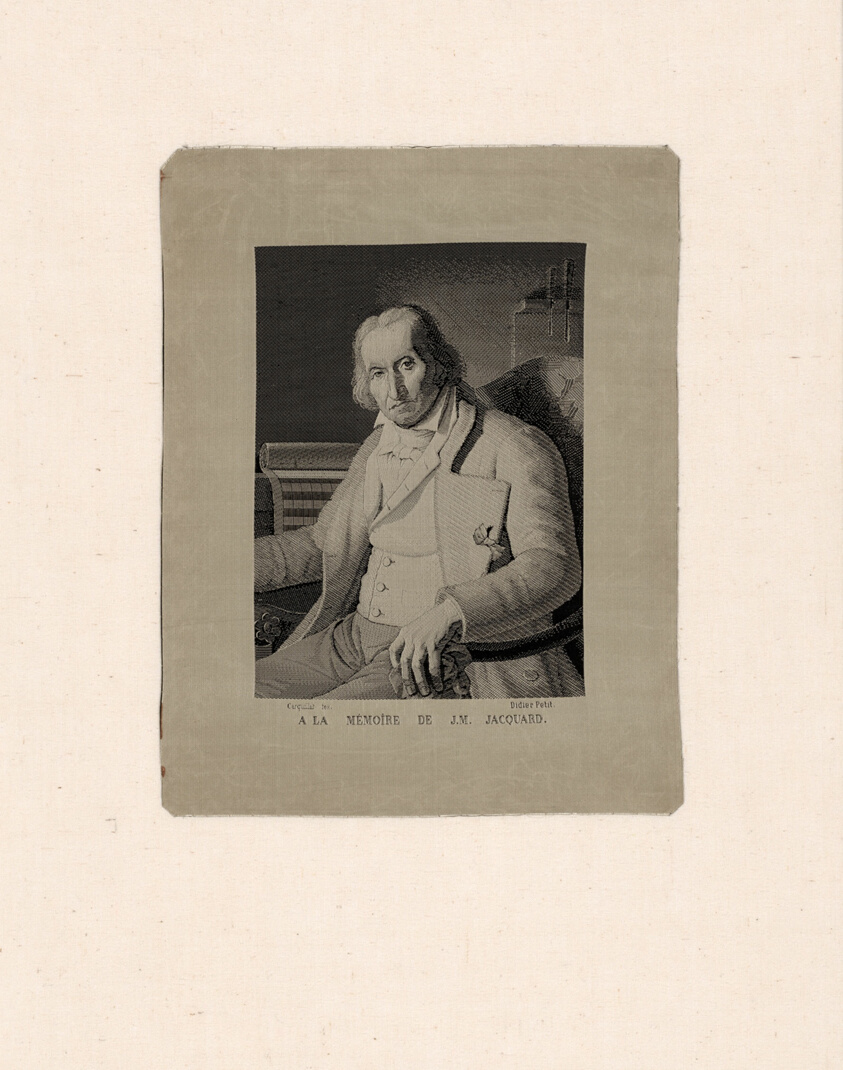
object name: Textile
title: Portrait of Joseph Marie Jacquard (1752–1834)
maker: After a painting and engraving by Jean-Claude Bonnefond (French, 1796–1860); Woven by Carquillat (French, 1803–1884); Produced by Didier Petit et Cie.; France, Lyon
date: 19th century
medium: Silk, warp faced weft ribbed plain weave with plain interlacings of secondary binding warps, supplementary patterning wefts and self-patterning ground wefts; woven on loom with Jacquard attachment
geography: Lyon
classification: textile; weaving